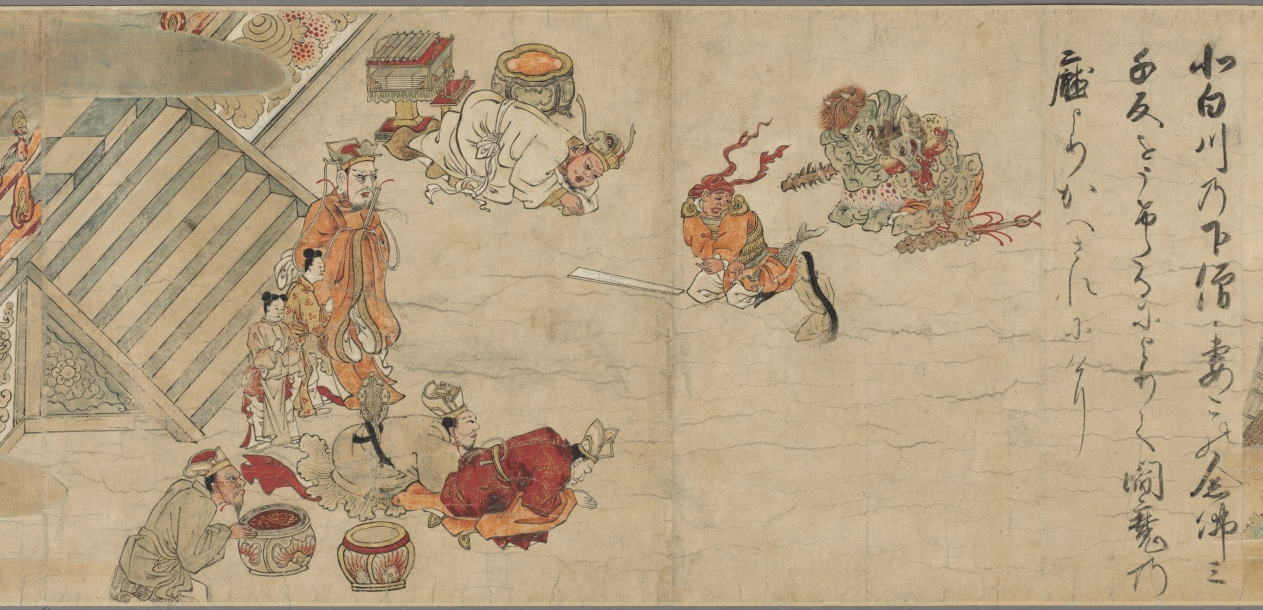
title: The Illustrated Miraculous Origins of the Yūzū Nenbutsu School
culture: Japan, Kamakura period (1185–1333)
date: early 1300s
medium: Handscroll; ink, color, and gold on paper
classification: Painting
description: This painting is the second of a set of two illustrated handscrolls. The first scroll depicts the biography of the Japanese Buddhist monk Ryōnin. This scroll begins with scenes of Ryōnin’s death and relates episodes illustrating the efficacy of following his teachings. Ryōnin asserted the total interconnectedness of all things and the spiritual benefit of chanting the name of the Buddha Amida for one another.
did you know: The other scroll from this two-scroll set belongs to the Art Institute of Chicago.